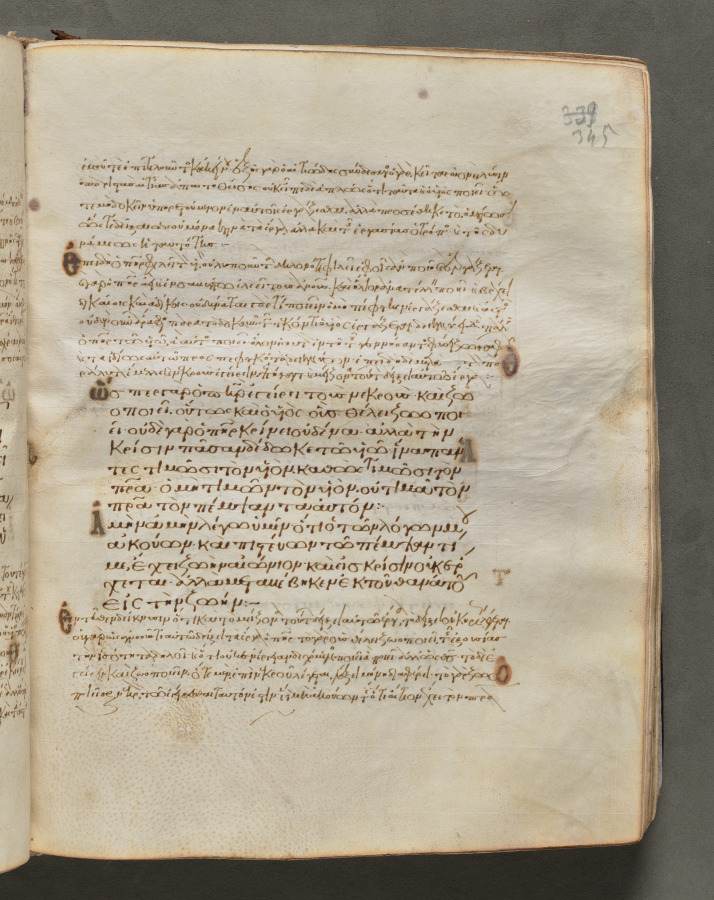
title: Text, folio 345 (recto), from a Gospel Book with Commentaries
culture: Byzantium, Constantinople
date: c. 1000–1100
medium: ink, tempera, and gold on vellum; leather binding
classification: Bound Volume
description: Each of the four gospels in this book opens on a page with brilliantly illuminated borders depicting the author of the text as well as birds—principally peacocks, symbols of the immortality of the soul—and fountains, representing the fountain of life and the salvation of the soul. This volume consists of 428 leaves with texts in Greek. Its level of sophistication suggests that it was probably written and decorated in a monastery in Constantinople.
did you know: Gospel books were carried in procession through Byzantine churches.